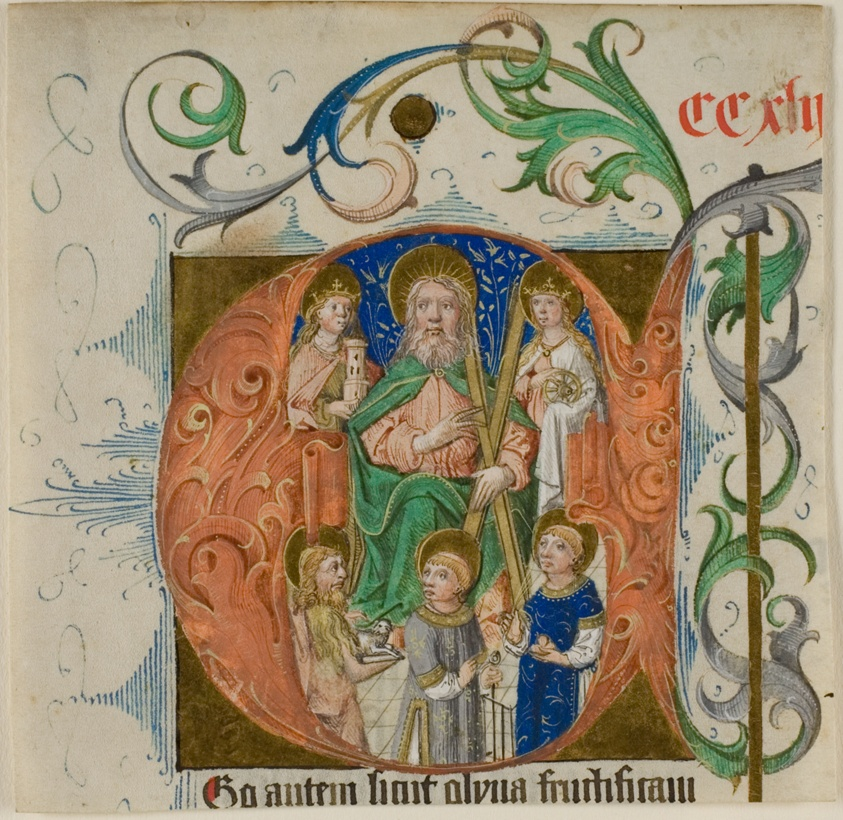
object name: Drawing and Watercolor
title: Saints Barbara, Catherine, Andrew, John the Baptist, Lawrence and Thomas à Beckett in a Historiated Initial "E" from a Missal or Breviary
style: medieval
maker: German (Middle Rhineland)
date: 1460/70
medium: Manuscript cutting in tempera and gold leaf, with gothica textualis inscriptions in Latin in brownish-black and red ink, on parchment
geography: Germany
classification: tempera; manuscript; drawings (visual works); prints and drawing